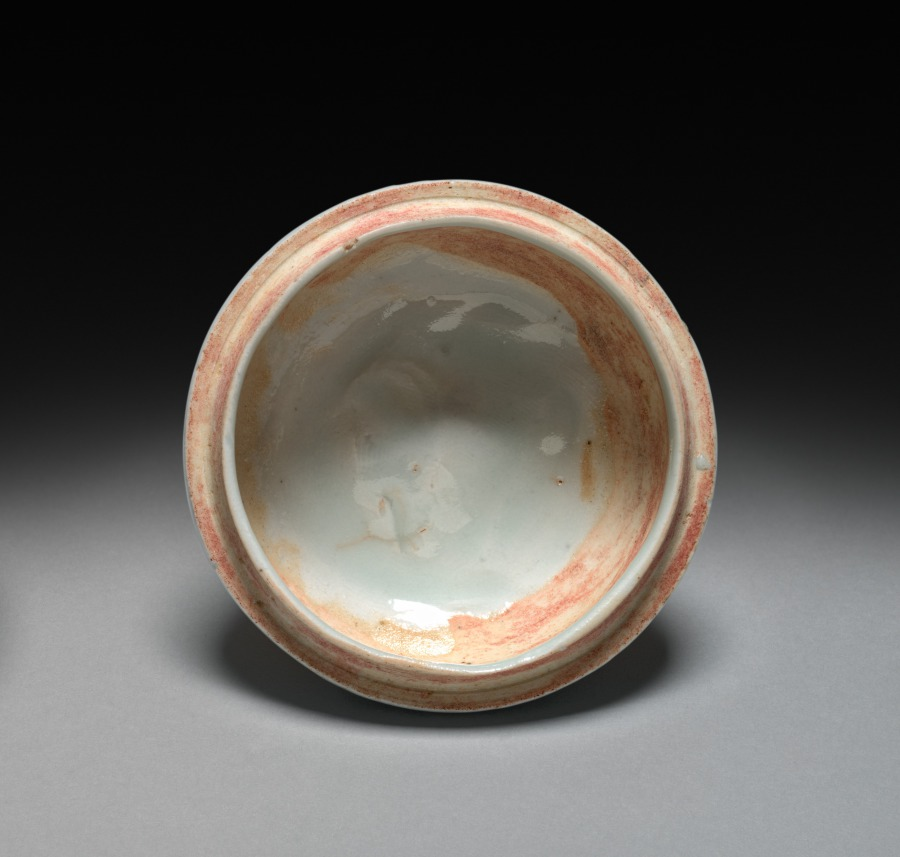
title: Circular Box: Qingbai Ware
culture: China, Southern Song Dynasty (1127-1279) - Yuan Dynasty (1271-1368)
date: 1200s-1300s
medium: glazed porcelain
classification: Ceramic